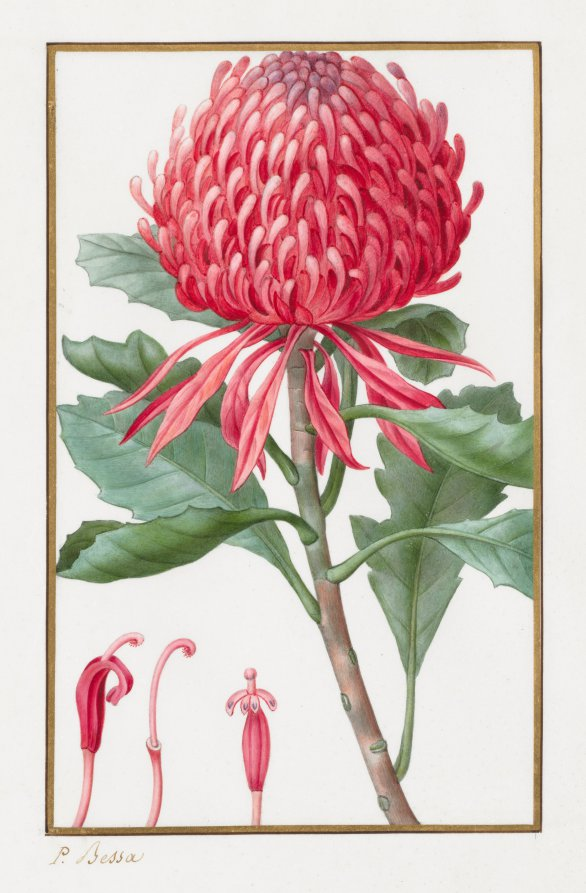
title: Untitled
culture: France, 19th century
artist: Pancrace Bessa (French, 1772–1846)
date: 1828–1835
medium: pencil and watercolor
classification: Drawing